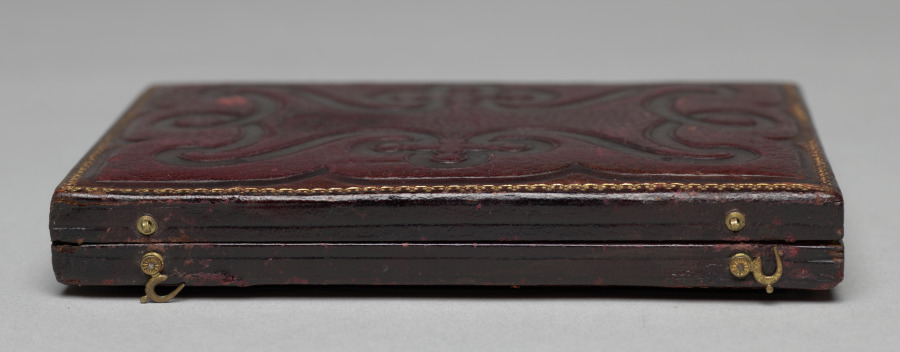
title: Secretary for a Lodge of a Temperance Organization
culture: America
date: c. 1854–55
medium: daguerreotype, half-plate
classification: Photograph